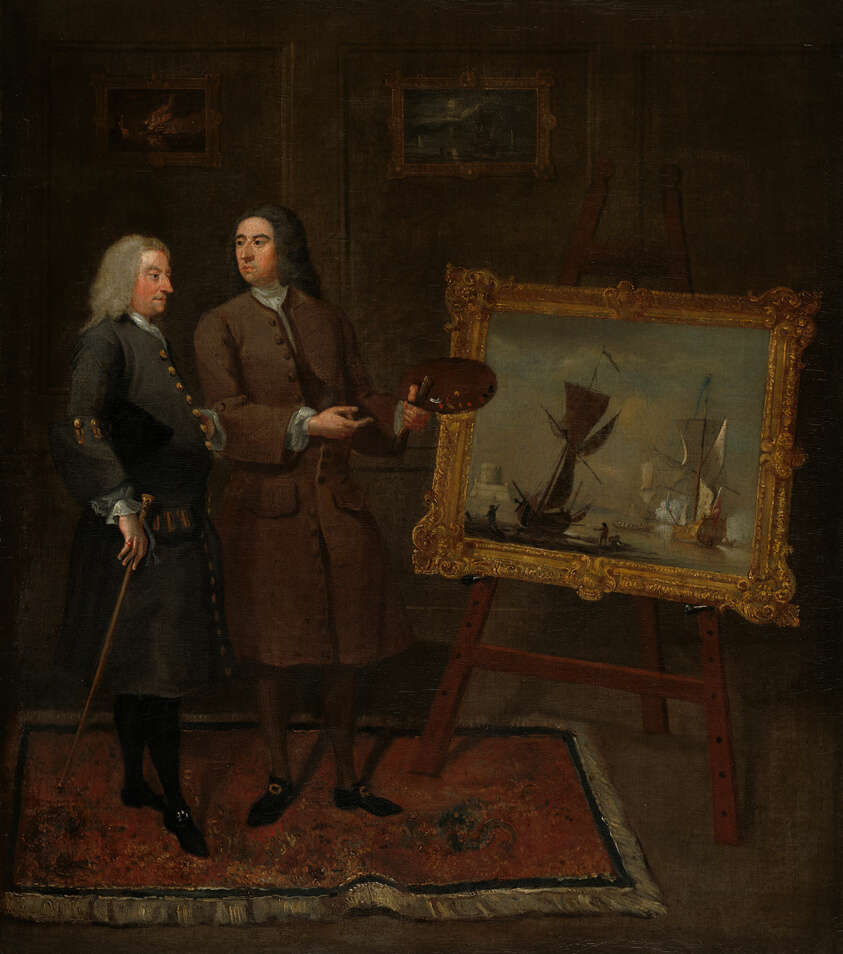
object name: Painting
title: Thomas Walker and Peter Monamy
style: 18th Century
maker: Gawen Hamilton (British, 1697-1737)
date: c. 1735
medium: Oil on canvas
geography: England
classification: oil on canvas; oil paintings (visual works); paint; british; painting; european painting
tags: portraits: multiple subjects, artist, Frame, interior, man, men, paintbrushes, painters, painting, paintings, portrait, portraits: male subject, rugs, ships, Century of Progress, world's fairs, Chicago World's Fairs